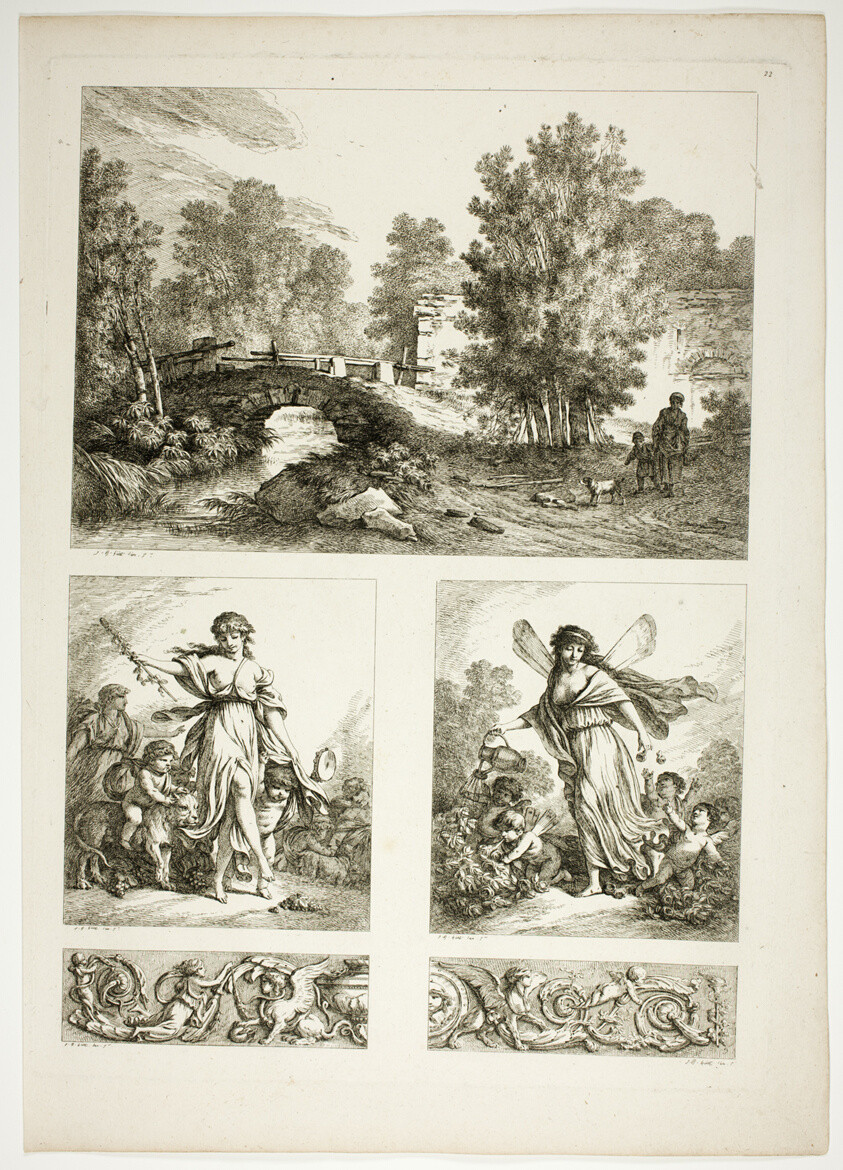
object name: Print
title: Plate 22 of 38 from Oeuvres de J. B. Huet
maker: Jean Baptiste Huet (French, 1745-1811)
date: 1796–99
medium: Etching on paper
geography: France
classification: etching; print; prints and drawing